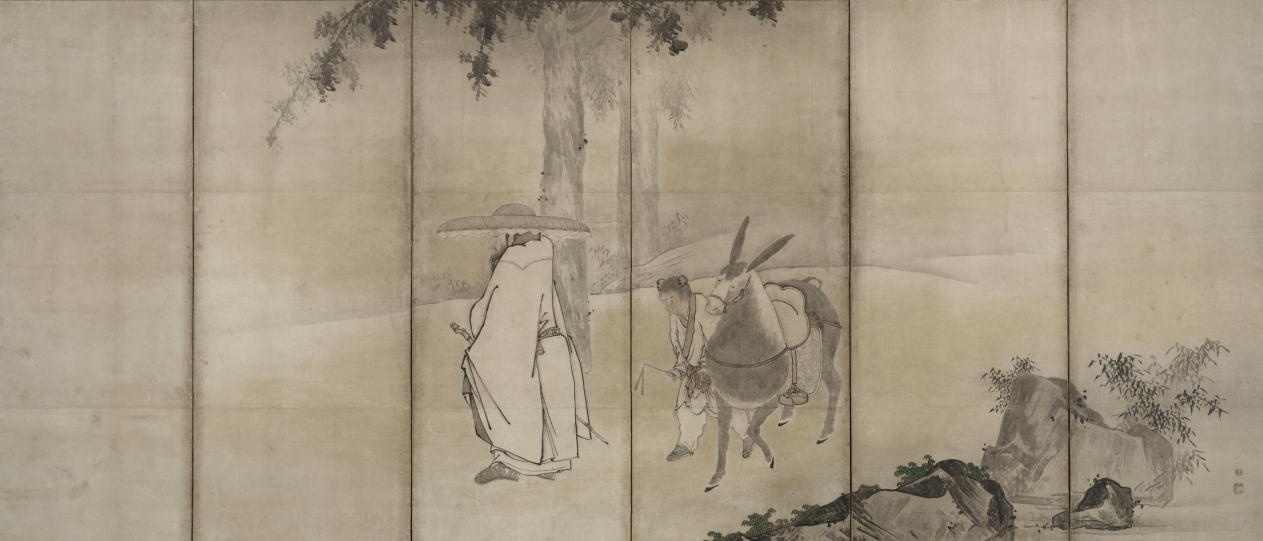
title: Su Shi (So Shoku)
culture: Japan, Momoyama period (1573–1615)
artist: Unkoku Tōgan (Japanese, 1547–1618)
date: early 1600s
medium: one of a pair of six-panel folding screens; ink, light color, and gold on paper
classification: Painting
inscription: Each screen in the pair is impressed with two seals arranged vertically, a round "Unkoku" seal above and square "Togan" seal below.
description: This pair of screens depicts episodes from the stories of famed Song-dynasty poets Su Shi of the 1000s and Zhou-dynasty official Pan Lang of the 900s. Both men were banished by their rulers for their perceived missteps. Su Shi’s comments on a series of economic reforms were seen as criticism of the emperor. Pan Lang composed an ill-advised verse about one of the king’s horses. In the left screen Pan rides backward on his donkey as he returns from exile so that he may have a last look at his now beloved Mount Hua. Su Shi, in the right screen, is shown embarking on his journey into exile. The artist of these screens, Unkoku Tōgan, was the founder of the Unkoku school of painting, which emulated the style of renowned ink painter Sesshū Tōyō (1420–1506). Tōgan was the official painter of the Mori family of what is now Yamaguchi prefecture in the south of Japan.